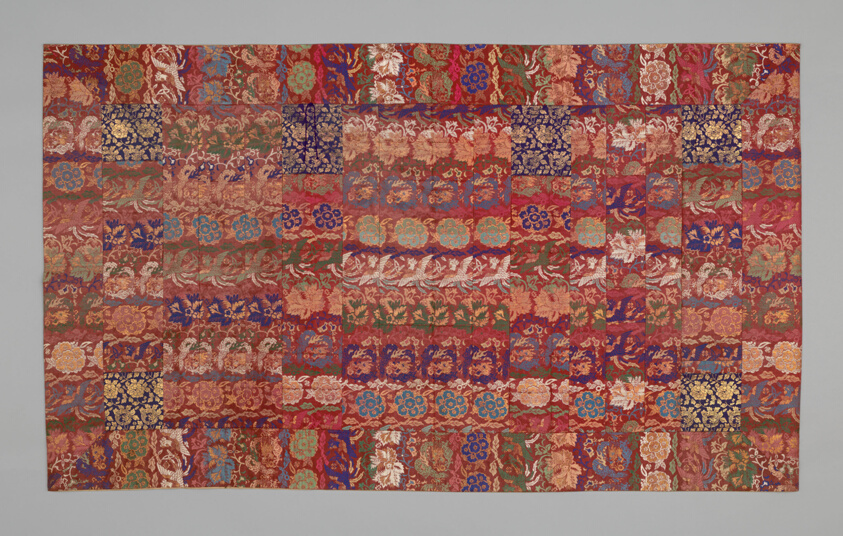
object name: Textile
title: Kesa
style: late edo, meiji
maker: Japan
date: late Edo period (1789–1868)/ Meiji period (1868–1912), 1850/90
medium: Heri, yô, and jô: silk, cotton and gold-leaf-over-lacquered paper strip, twill weave with twill interlacings of secondary binding warps and supplementary patterning wefts; shiten and niten: silk, cotton and gold-leaf-over-lacquered paper strip, twill weave with twill interlacings of secondary binding warps and supplementary patterning wefts; cords: silk, twill oblique interlacing; lining: cotton, weft-faced mixed twill weave self-patterned by main warp and ground weft floats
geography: Japan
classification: textile; weaving; liturgical - buddhist